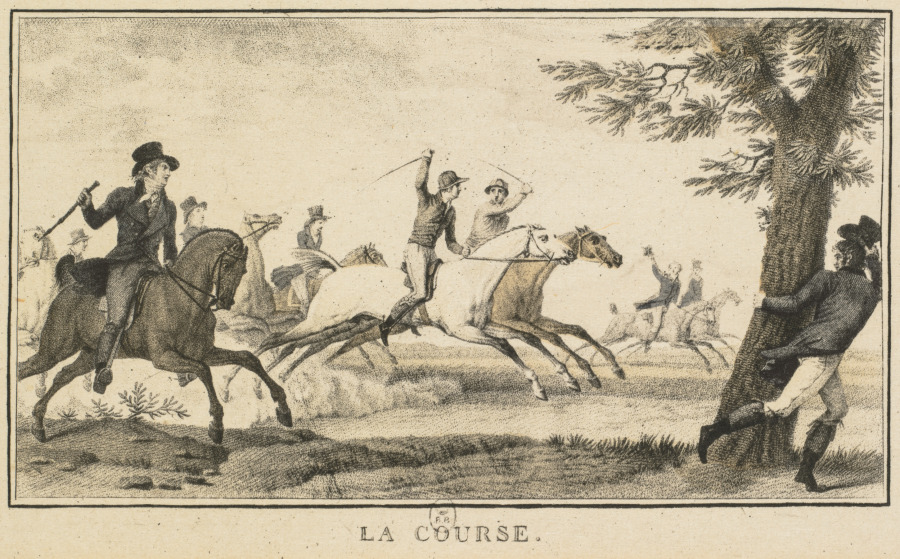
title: Racing Scenes: The Race (Scènes Hippiques: La course)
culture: France, 18th-19th century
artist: Carle Vernet (French, 1758–1836)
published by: Gravure en noir a l'aquatinte par Jazet, published by Jazet and Aumont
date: c. 1780–1836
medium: lithograph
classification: Print